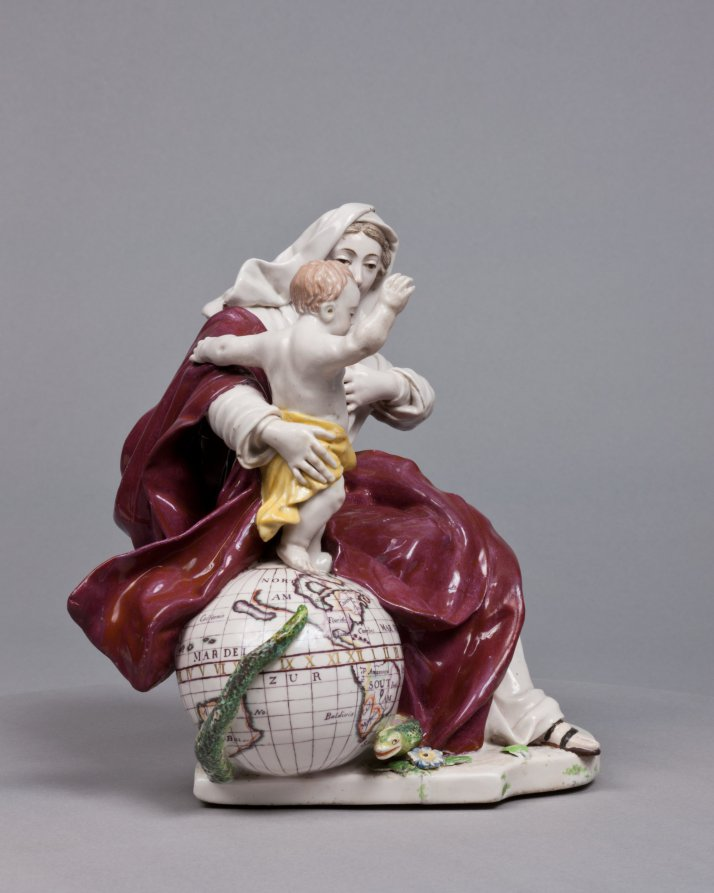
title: Madonna and Child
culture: England, Chelsea, 18th century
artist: Chelsea Porcelain Factory (Britain, London, 1745–84)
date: c. 1755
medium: porcelain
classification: Ceramic